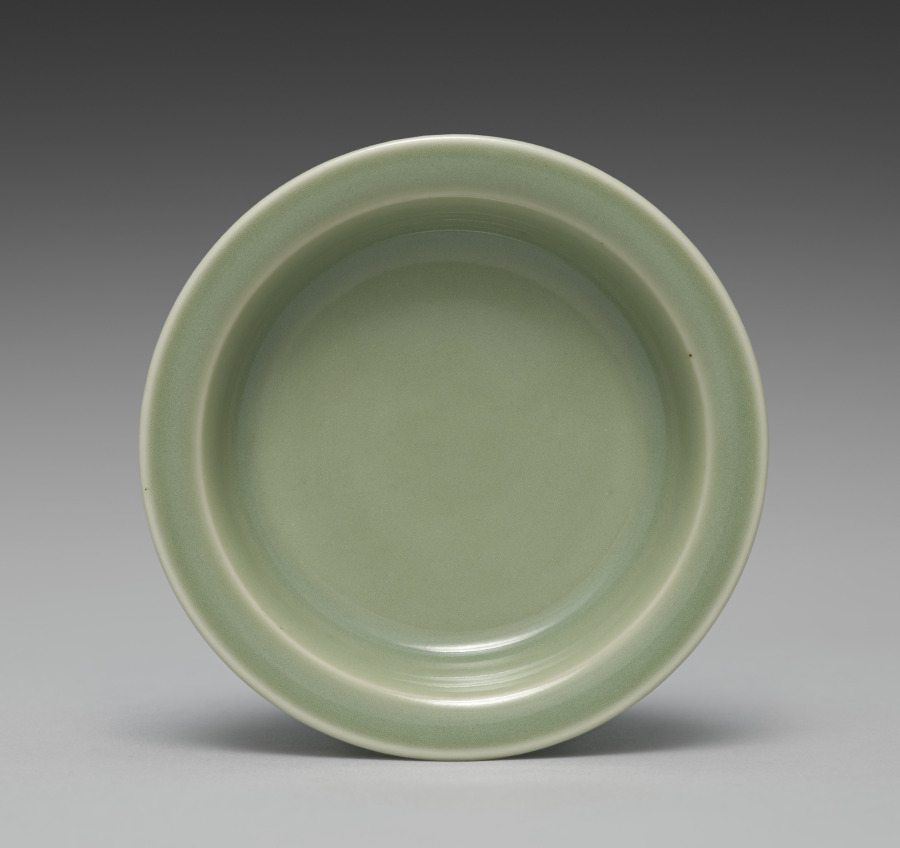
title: Saucer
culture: Japan, Meiji period (1868–1912)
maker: Seifū Yohei III (Japanese, 1851–1914)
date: 1893–1914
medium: One from a set of ten dishes; porcelain with green glaze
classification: Ceramic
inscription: 清風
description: Yohei III’s main output for his sophisticated clientele was in the form of tea sets and dining sets. He created a range of dishes in green glazes. He often produced in pairs, sets of five, or sets of ten. For this set of ten small dishes in a simple, round form that emphasizes the glaze above all, the box lid designates the piece as seiji, or green-glazed porcelain, using a general term for the extensive palette of green glazes often called celadon in English. The box lid further identifies the dishes themselves as tōchō, literally “bean-sized saucers,” a size that makes them suitable for dipping sauces.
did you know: The ten dishes in this set are stored in stacks of five in a two-compartment box.